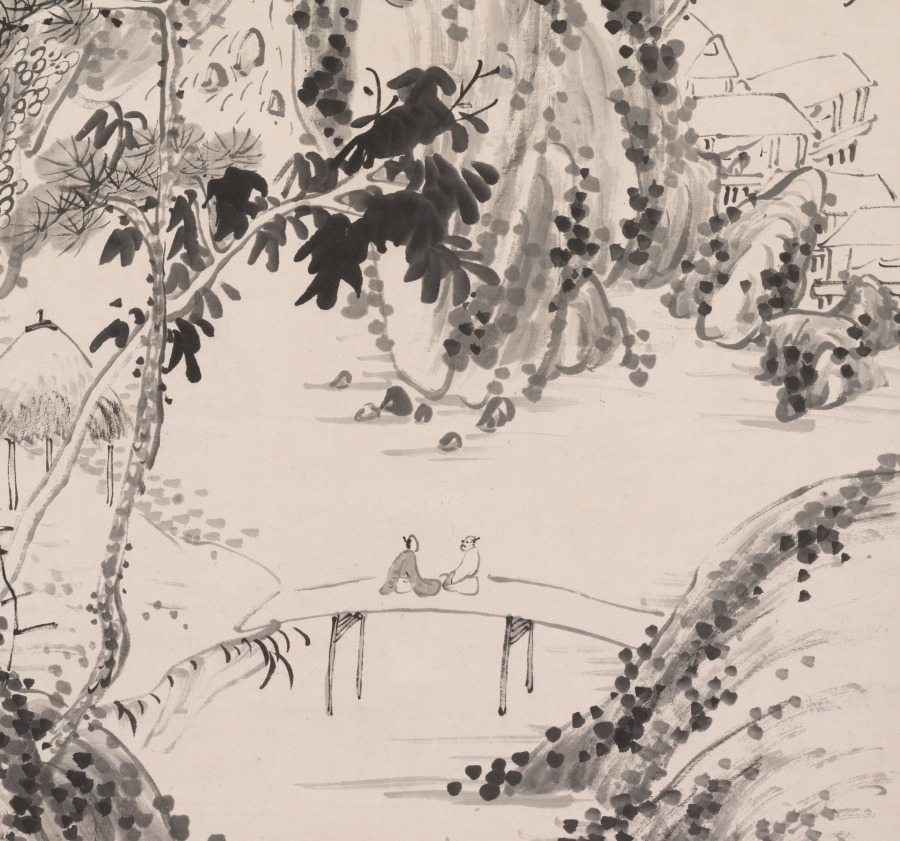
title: Landscape with Figures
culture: Japan, Edo period (1615–1868)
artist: Fujimoto Tesseki (Japanese, 1816–1863)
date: c. 1840–63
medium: hanging scroll; ink and color on paper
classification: Painting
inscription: Artist's inscription and two seals in upper right. A third seal in lower left.